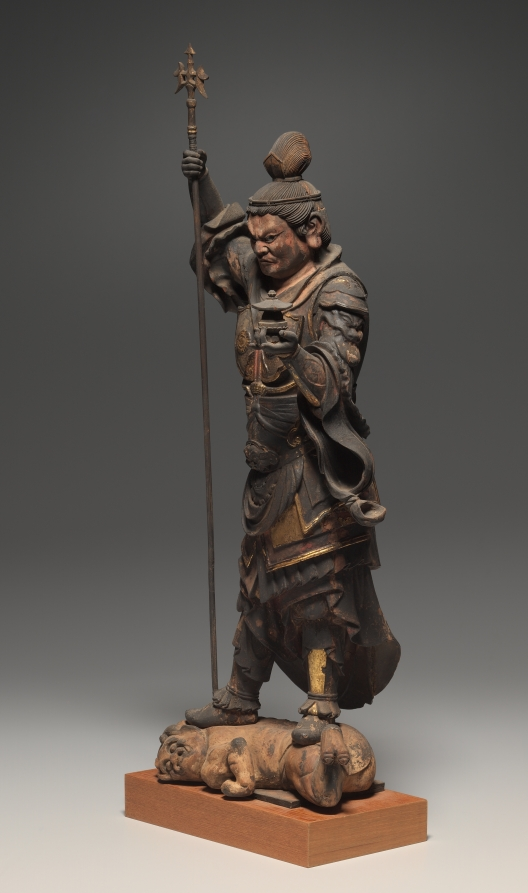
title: Guardian King of the North (Bishamonten)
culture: Japan, Kamakura period (1185–1333)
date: 1185–1333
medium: wood with gold polychromy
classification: Sculpture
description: In Buddhism, Bishamonten is one of four kings who protect the cardinal directions. He stands with a stupa symbolizing the Buddhist teachings and relics of the Buddha in the palm of his left hand, and a spear to foil the enemies of Buddhism in his right. He crushes a demon beneath his feet.